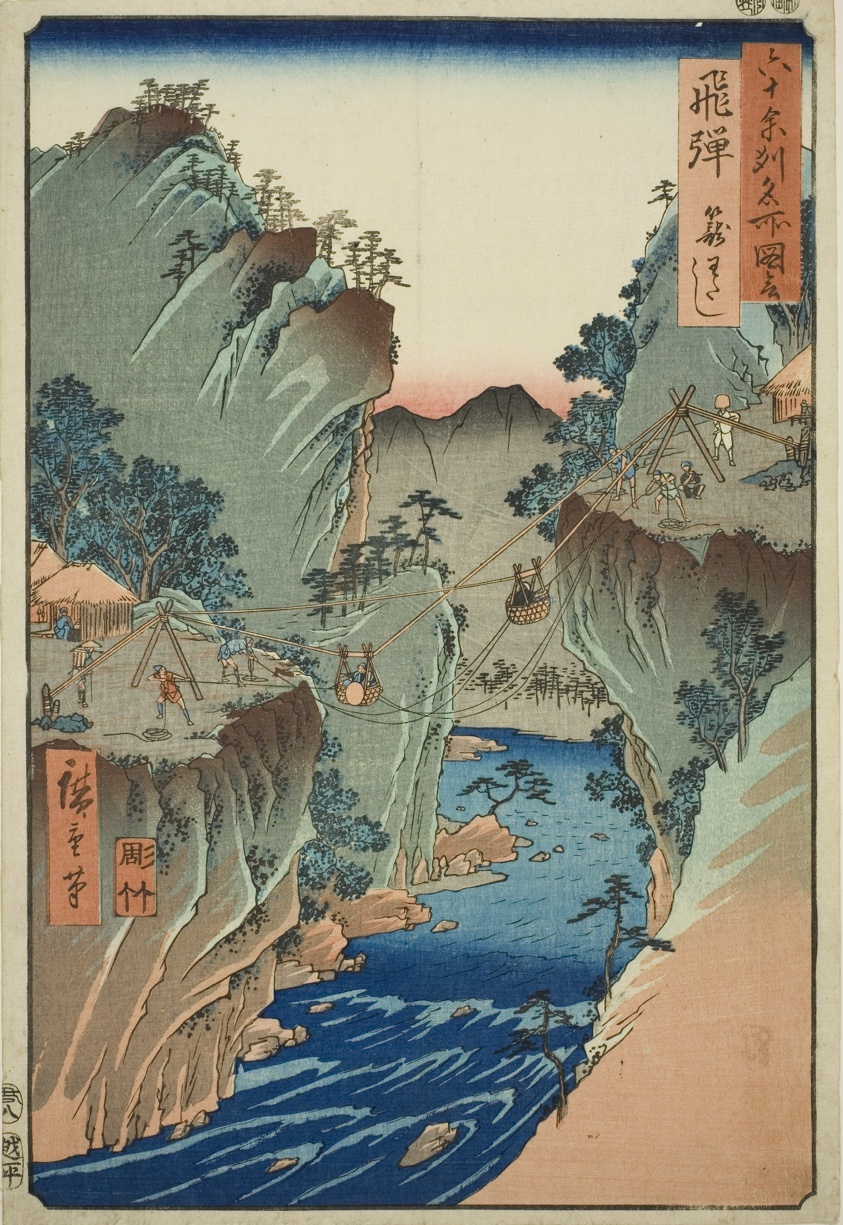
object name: Print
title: Hida Province: Basket Ferry (Hida, Kagowatashi), from the series "Famous Places in the Sixty-odd Provinces (Rokujuyoshu meisho zue)"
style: Japanese (culture or style)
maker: Utagawa Hiroshige 歌川 広重; Japanese, 1797-1858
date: 1853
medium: Color woodblock print; oban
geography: Japan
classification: woodblock print; print; asian art